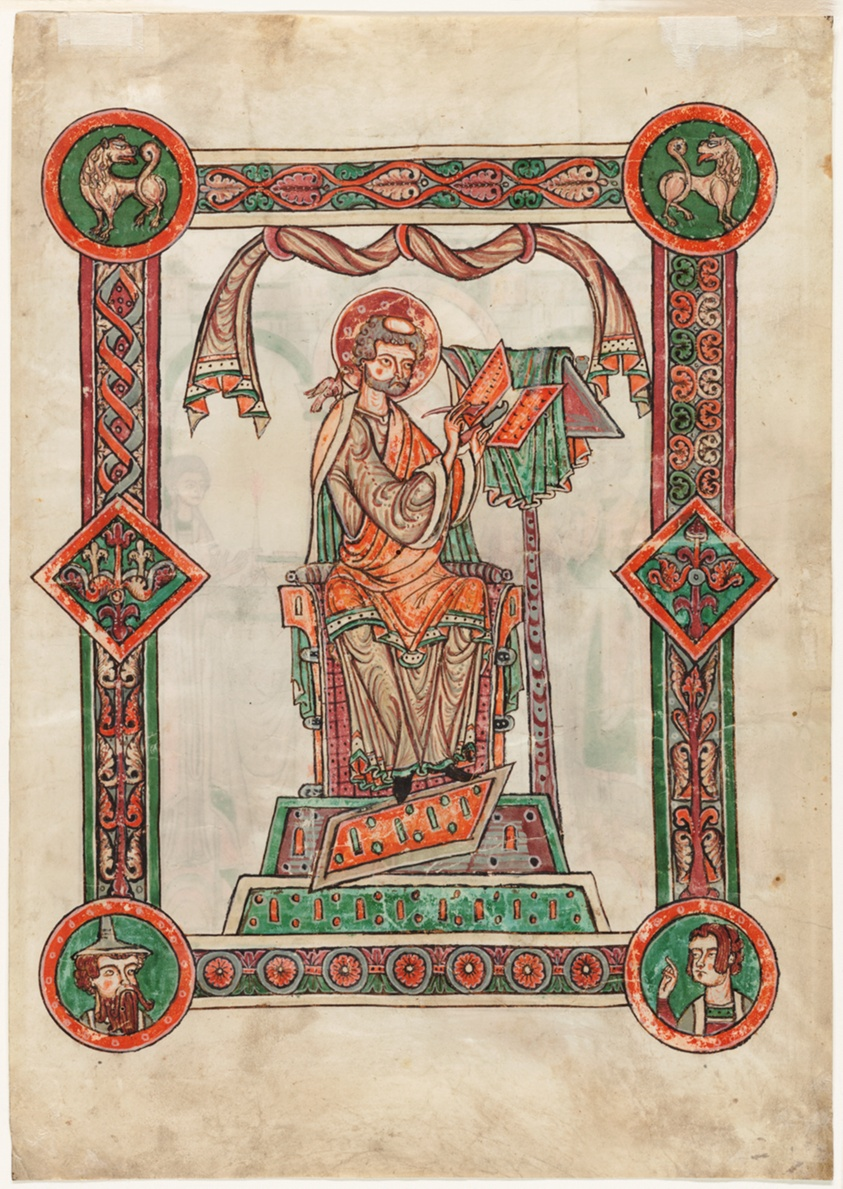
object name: Drawing and Watercolor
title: Saint Gregory as Author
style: medieval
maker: Scriptorium of Weingarten Abbey; South German (Swabia); founded 1056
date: 1188/1200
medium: Opaque watercolor on parchment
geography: Germany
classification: watercolor; manuscript; drawings (visual works); prints and drawing